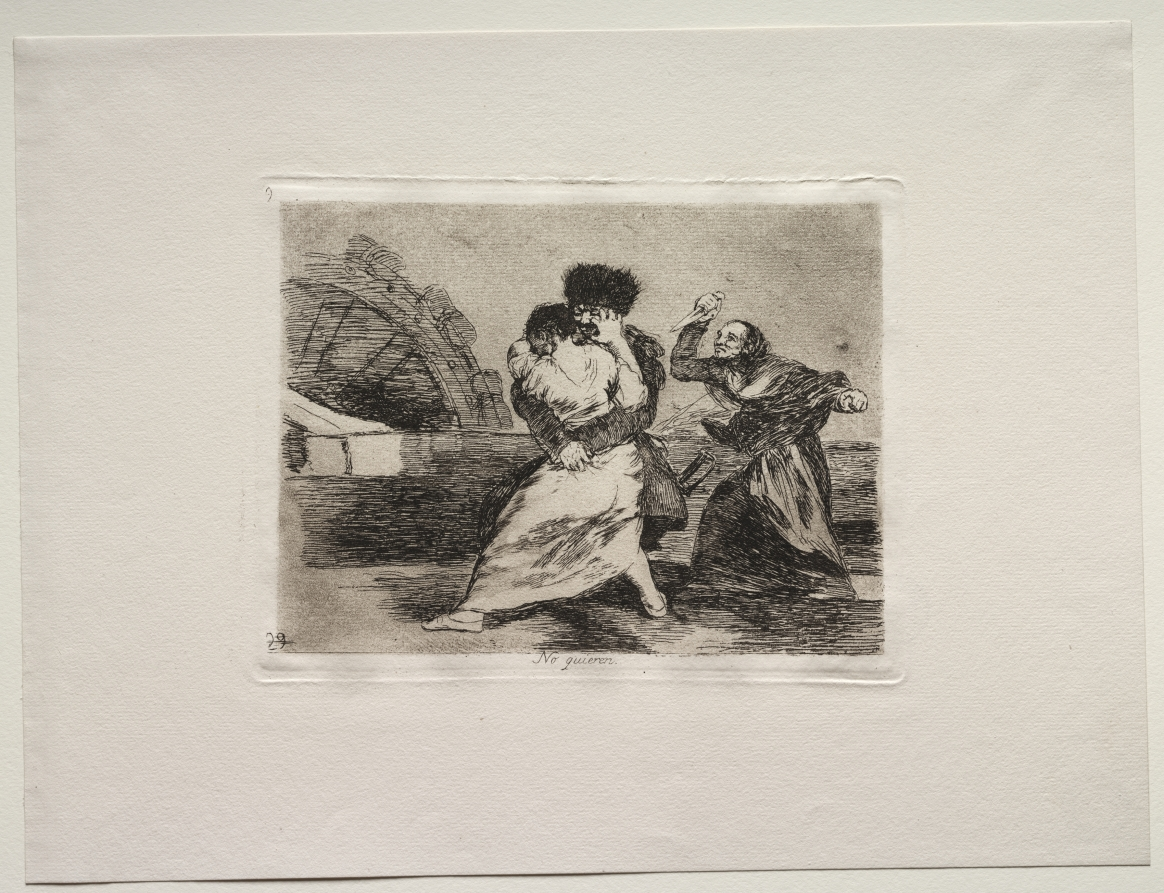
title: The Horrors of War: They Don't Like It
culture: Spain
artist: Francisco de Goya (Spanish, 1746–1828)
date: c. 1810–20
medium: etching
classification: Print